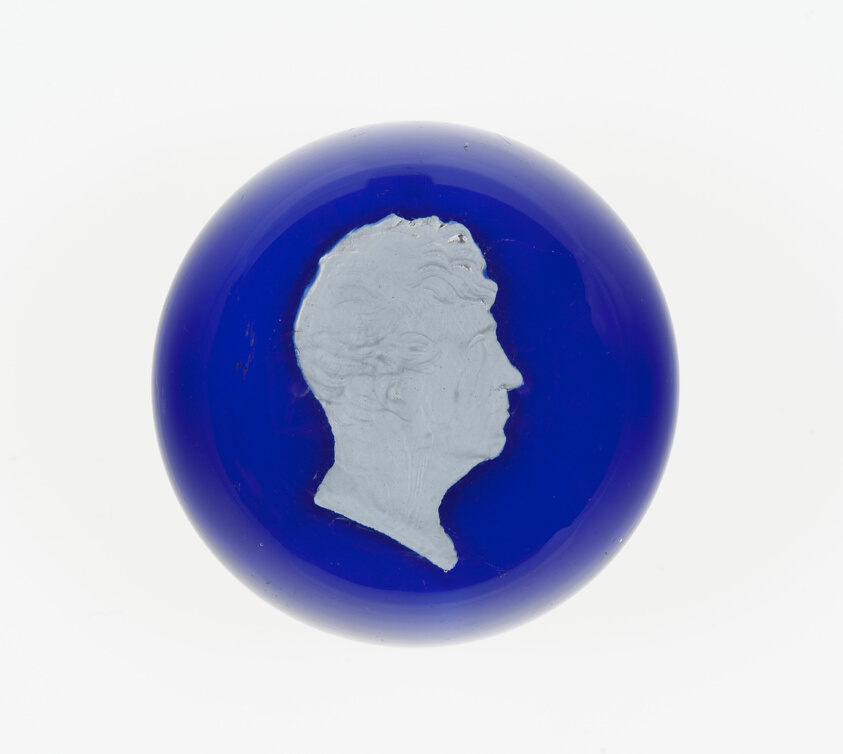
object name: Glass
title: Paperweight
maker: Baccarat Glassworks (Cristalleries de Baccarat); Lorraine, France, founded 1764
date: c. 1846–55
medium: Glass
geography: Lunéville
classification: paperweight; sulphide (glass); european decorative arts; glass